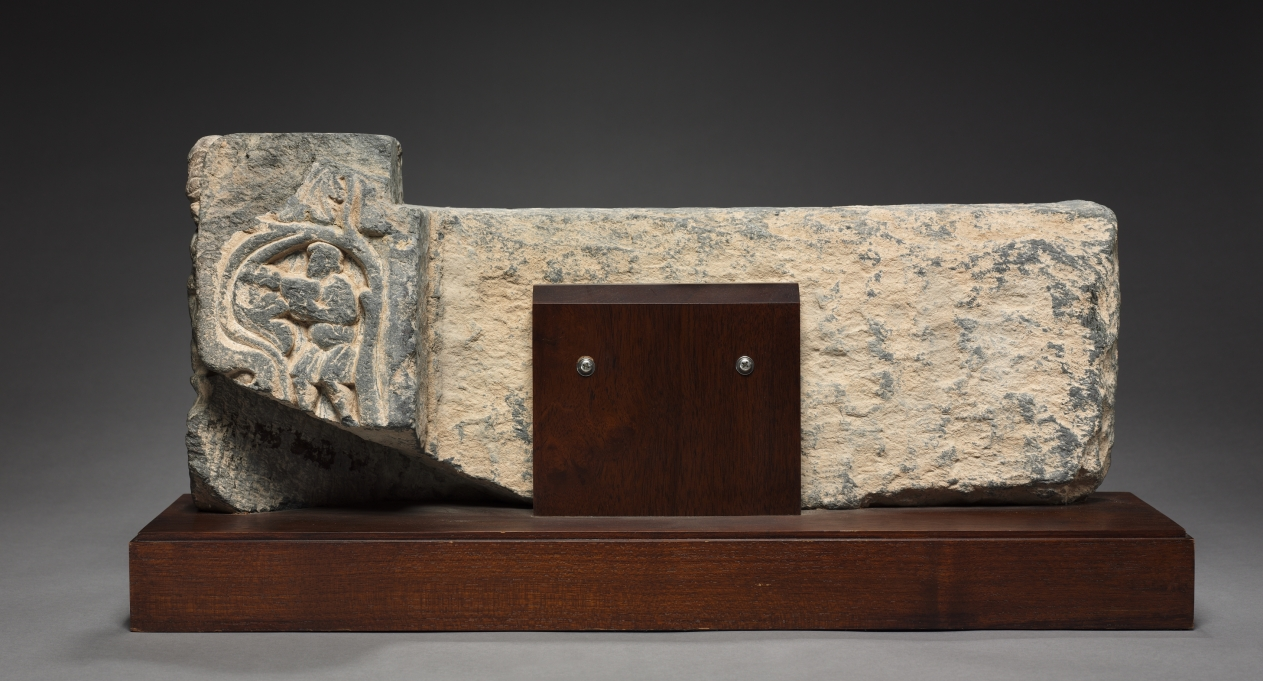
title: Bacchanalian Relief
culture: Pakistan, Gandhara, Kushan period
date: 200s CE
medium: schist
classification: Stone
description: Grape vines create vignettes with scenes of drunken revelry on this architectural carving that once fit by joinery to other carved stone blocks at the base of a Buddhist monument. Bacchus himself, the Greco-Roman god of wine, may be the third figure from the left; bearded, portly, and inebriated, his garment slips as he collapses. Cupid and Aphrodite appear in the vignette on the right next to an amorous couple. On the side is a female nature divinity, grasping the branch of a tree, but unlike her counterparts from farther south in India, she is clothed in a long tunic, pants, and scarf associated with the dress of the Central Asian nomadic groups.